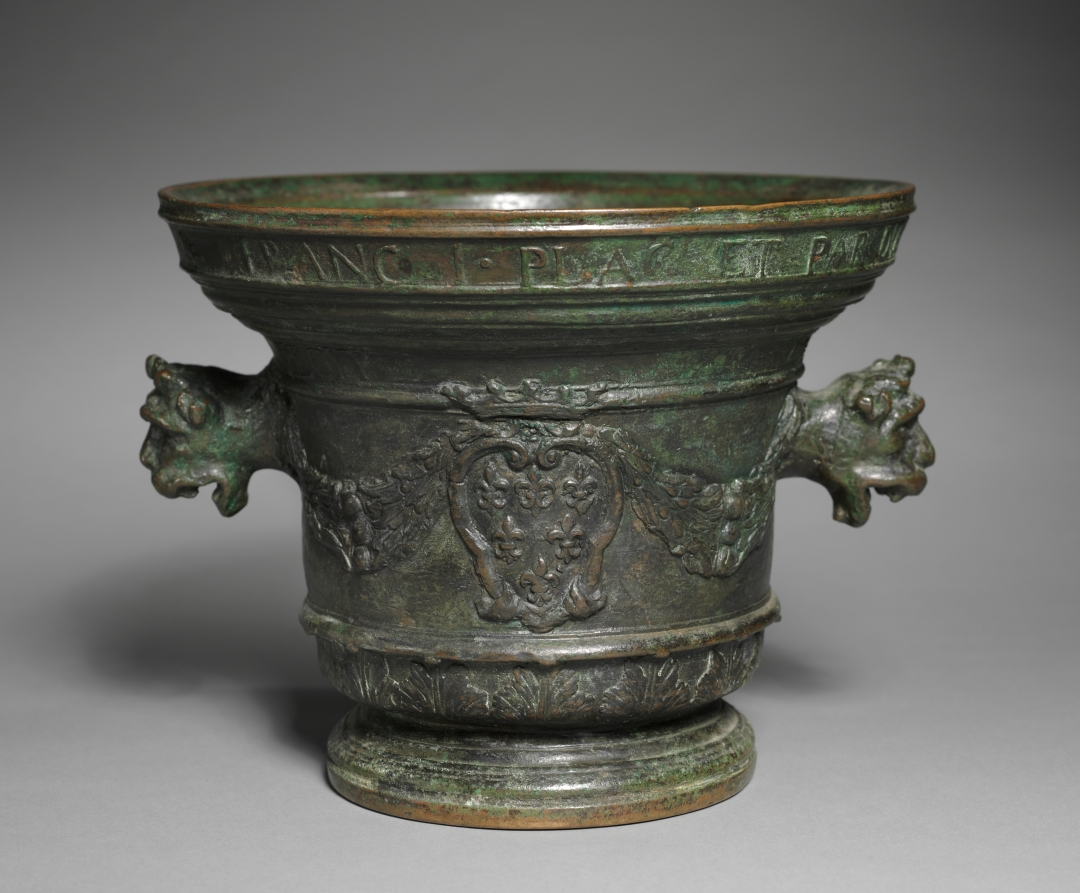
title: Mortar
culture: Italy, 18th century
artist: Georgius Mazzochus (Italian)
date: 1712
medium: bronze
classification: Sculpture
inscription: Inscription on obverse: "ANNO M D C C XII / GEORGIUS MAZZOCHUS / (fleur-de-lis)" Insciption on reverse: "FRANC I . PLAC ET PAR DUX VII / FECIT / (crowned shield with 6 fleur-de-lis)"